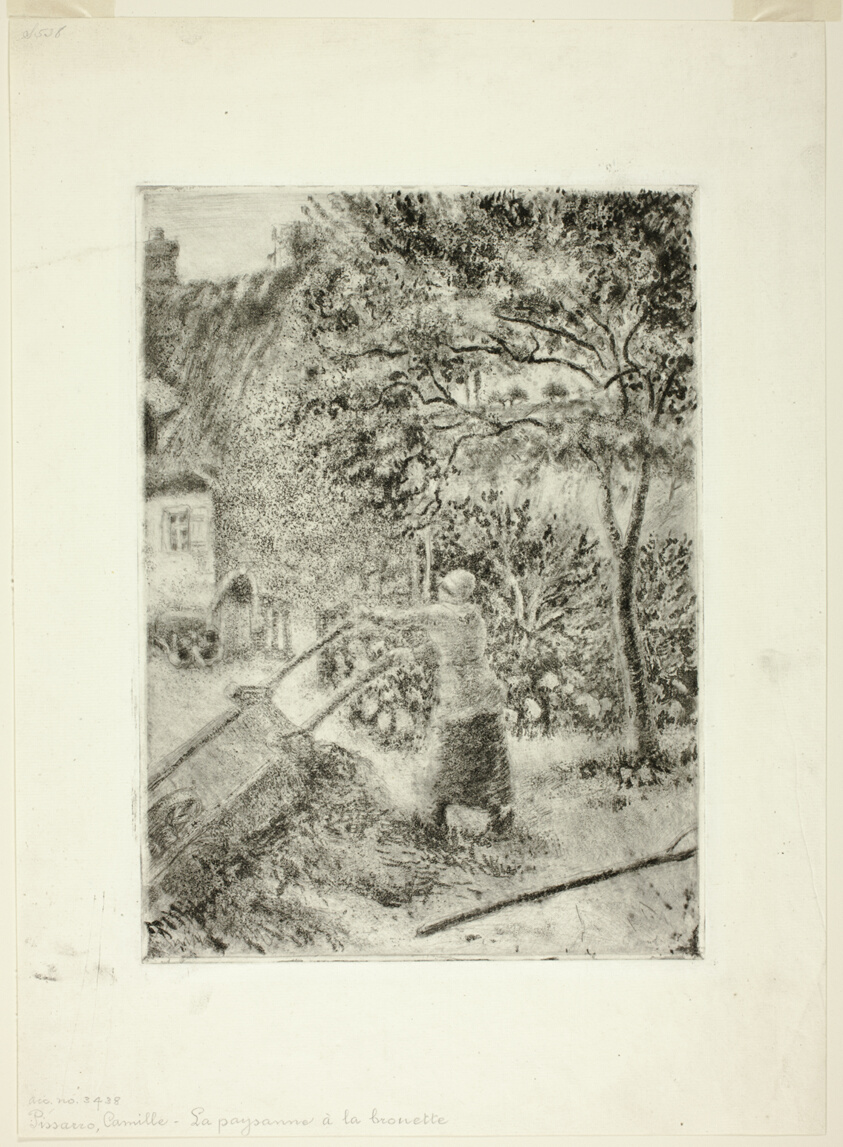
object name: Print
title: Woman Emptying a Wheelbarrow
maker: Camille Pissarro (French, 1830-1903)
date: 1880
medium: Aquatint and drypoint in black on ivory laid paper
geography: France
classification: aquatint; print; prints and drawing